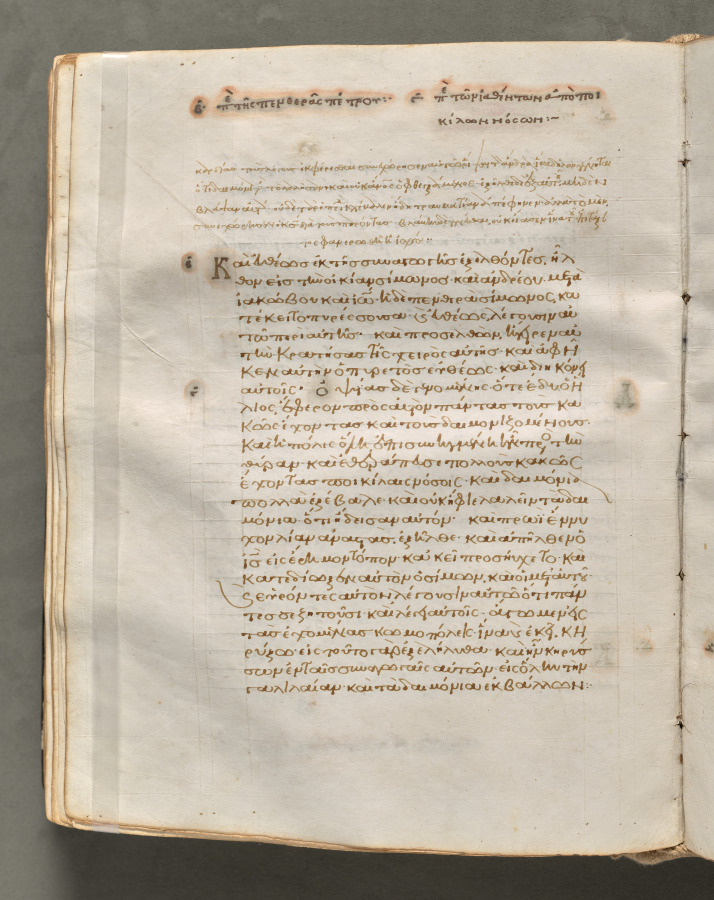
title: Text, folio 135 (verso), from a Gospel Book with Commentaries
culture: Byzantium, Constantinople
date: c. 1000–1100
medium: ink, tempera, and gold on vellum; leather binding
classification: Bound Volume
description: Each of the four gospels in this book opens on a page with brilliantly illuminated borders depicting the author of the text as well as birds-principally peacocks, symbols of the immortality of the soul-and fountains, representing the fountain of life and the salvation of the soul. This volume consists of 428 leaves with texts in Greek. Its level of sophistication suggests that it was probably written and decorated in a monastery in Constantinople.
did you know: Gospel Books were carried in procession through Byzantine churches.